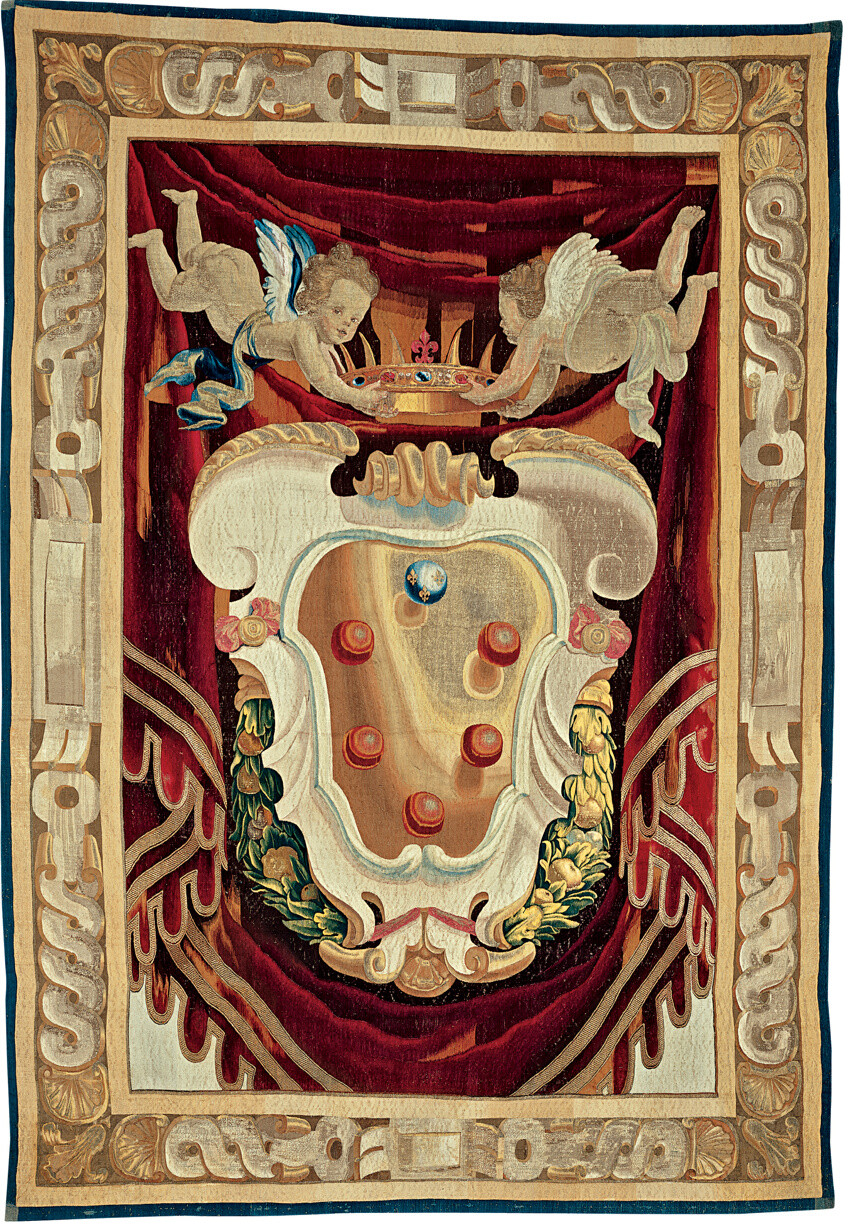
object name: Textile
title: Medici Armorial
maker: After a cartoon by Lorenzo Lippi (1606–1665), painted before April 27, 1643; Woven at the Medici workshop under the direction of Pietro van Asselt (c. 1600–1644), before June 15, 1644; Italy, Florence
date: 1643/44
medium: Wool, silk, and gilt-metal-strip-wrapped silk, slit and double interlocking tapestry weave with wrapping outlining wefts and areas of 4:4 plain interlacing of gilt-metal-strip-wrapped silk wefts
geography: Italy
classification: weaving - tapestry; textile